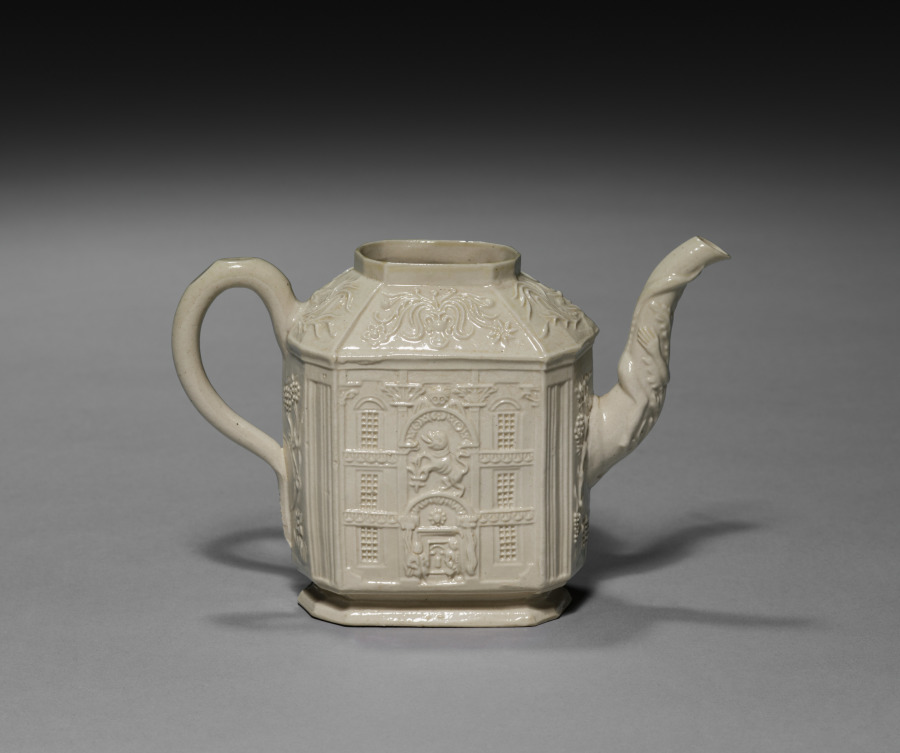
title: Teapot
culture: England, Staffordshire, 18th century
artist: Staffordshire Factory (British)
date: c. 1745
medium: salt-glaze earthenware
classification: Ceramic